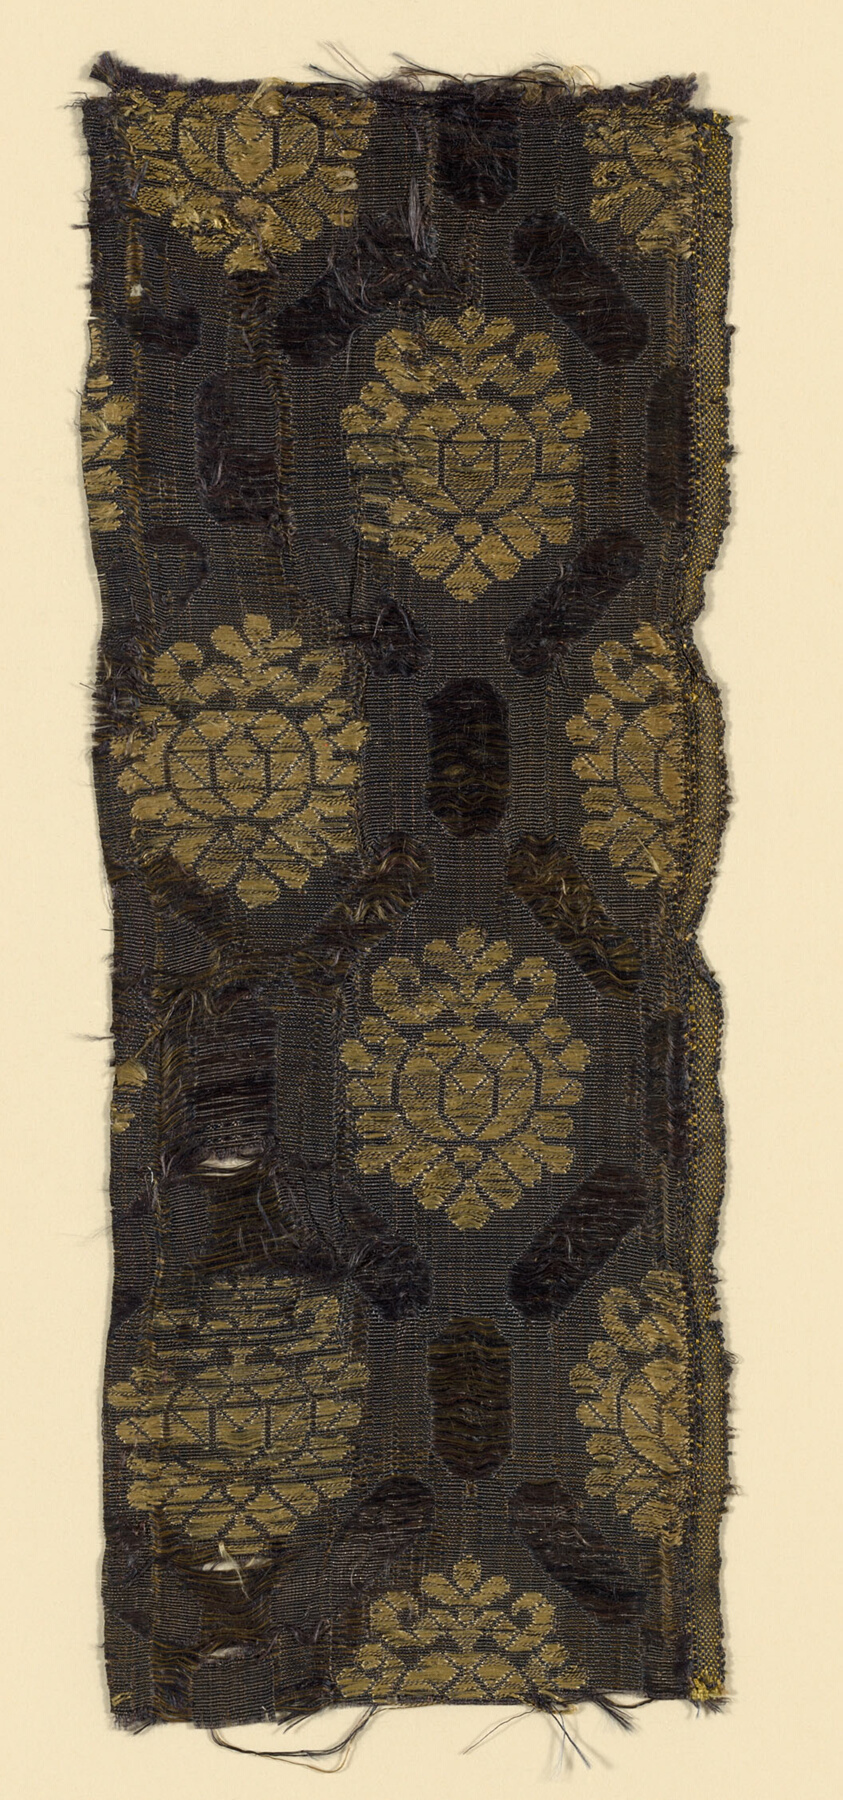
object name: Textile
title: Fragment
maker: Italy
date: 1625/75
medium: silk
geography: Italy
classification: textile; weaving